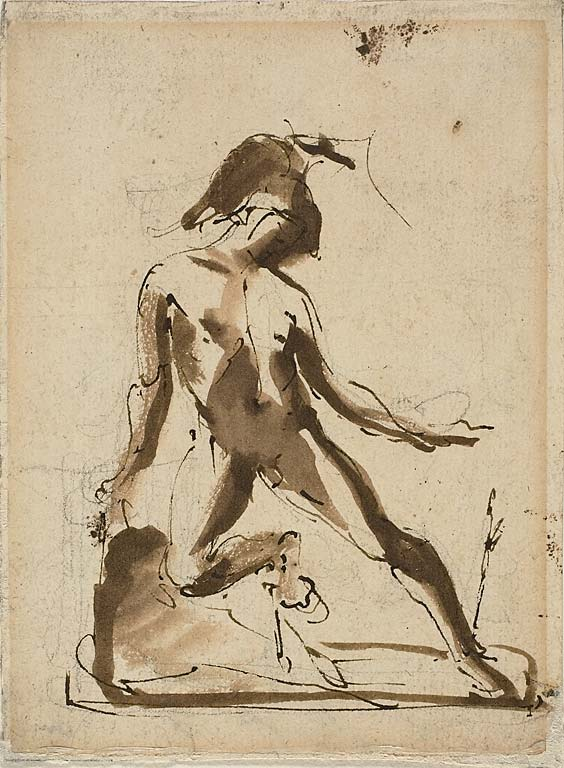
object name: Drawing and Watercolor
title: Mythological Figure: Achilles with Lionskin (recto); Sketches of Figures (verso)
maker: Unknown artist (17th century); or possibly Etienne de Lavallee-Poussin (French, 1735-1802); or possibly Giuseppe Bernardino Bison (Italian, 1762-1844)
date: 17th century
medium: Pen and brown ink, with brush and brown wash and graphite (recto), and pen and brown ink, with black chalk (verso), on ivory laid paper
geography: France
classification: pen and ink drawings; drawings (visual works); prints and drawing; paper